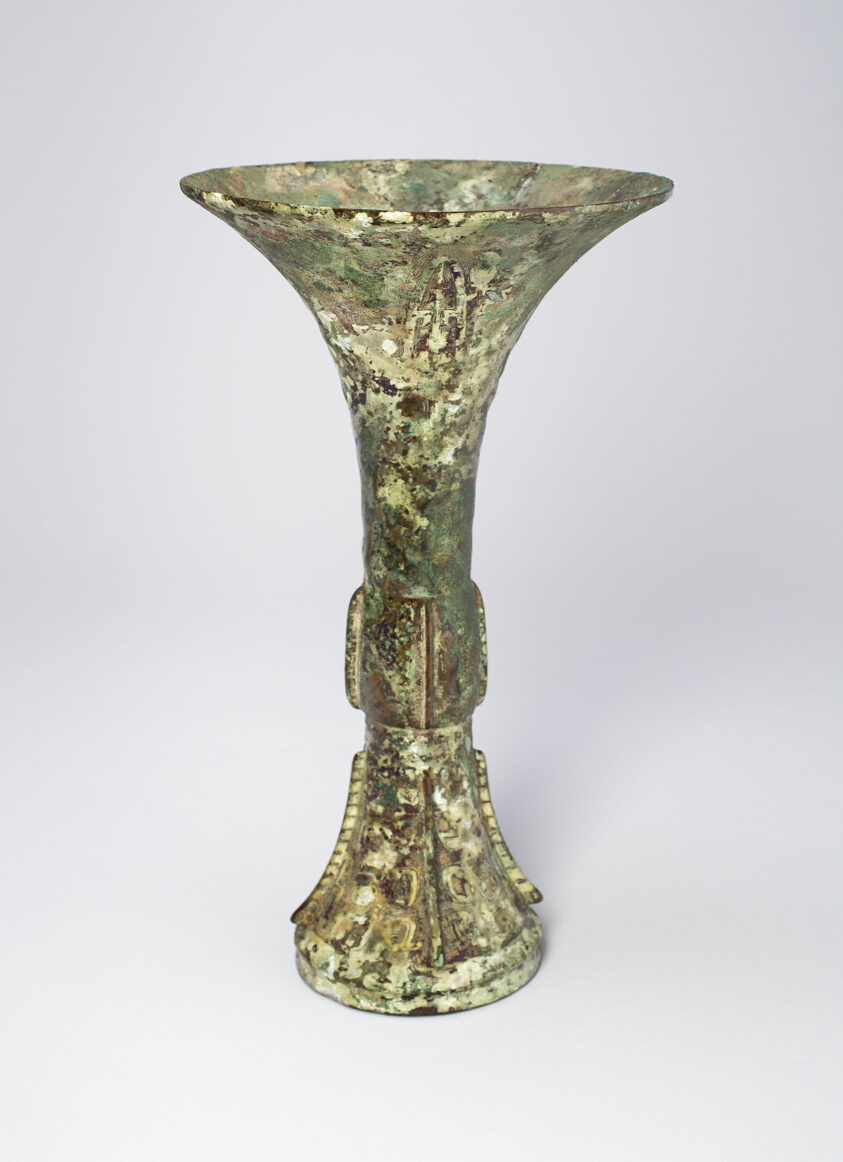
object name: Vessel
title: Beaker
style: Chinese (culture or style)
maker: China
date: Shang dynasty (c. 1600–1050 B.C.)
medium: Bronze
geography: China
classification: drinking vessel; bronze; metal; vessel; asian art